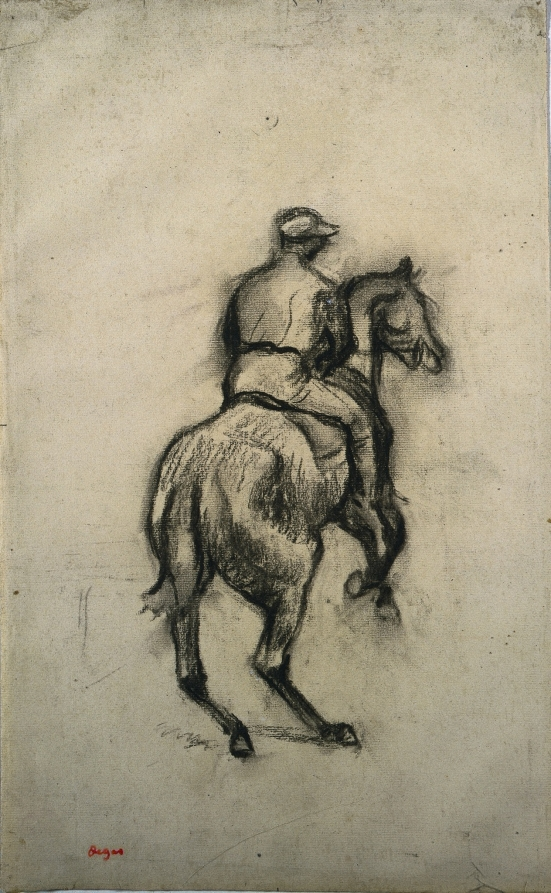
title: The Jockey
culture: France, 19th century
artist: Edgar Degas (French, 1834–1917)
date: c. 1885–1900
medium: charcoal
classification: Drawing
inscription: VERSO, upper left, in graphite: 1 [underlined] ; upper left, in red crayon: ch 20 ; center, in graphite: 29 1/2 46 / 17 17 / 11453 ; lower right, in blue crayon: Ph1421 / 2412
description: A study made for a larger racetrack composition rendered in pastel, Degas’s Jockey shows the attention that the artist lavished on perfecting the positions of the horse’s legs, hoofs, jaw straining against the bit, and the swish of the tail.